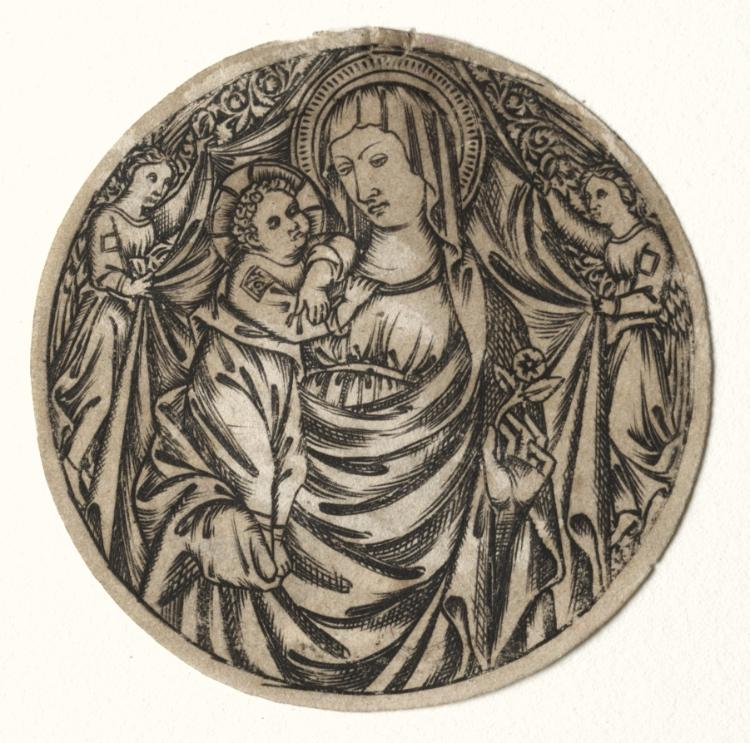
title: Virgin and Child with Two Angels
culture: Italy, 15th century (?)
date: 1400s(?)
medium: engraving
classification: Print